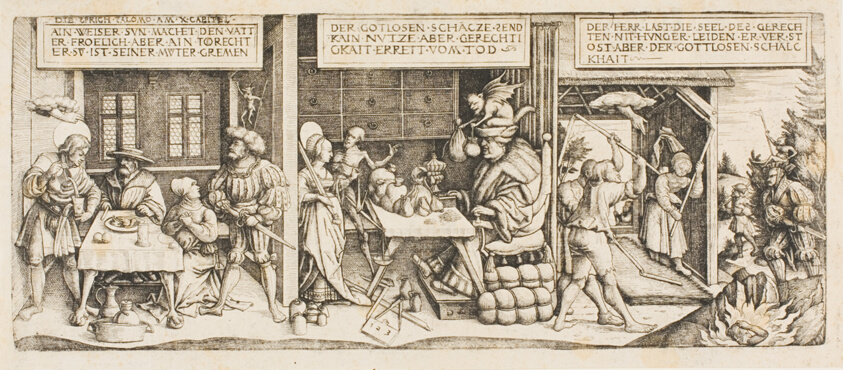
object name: Print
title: Three Proverbs of King Solomon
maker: Daniel Hopfer, I (German, 1470-1536)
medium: Etching in black on paper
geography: Germany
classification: etching; print; prints and drawing